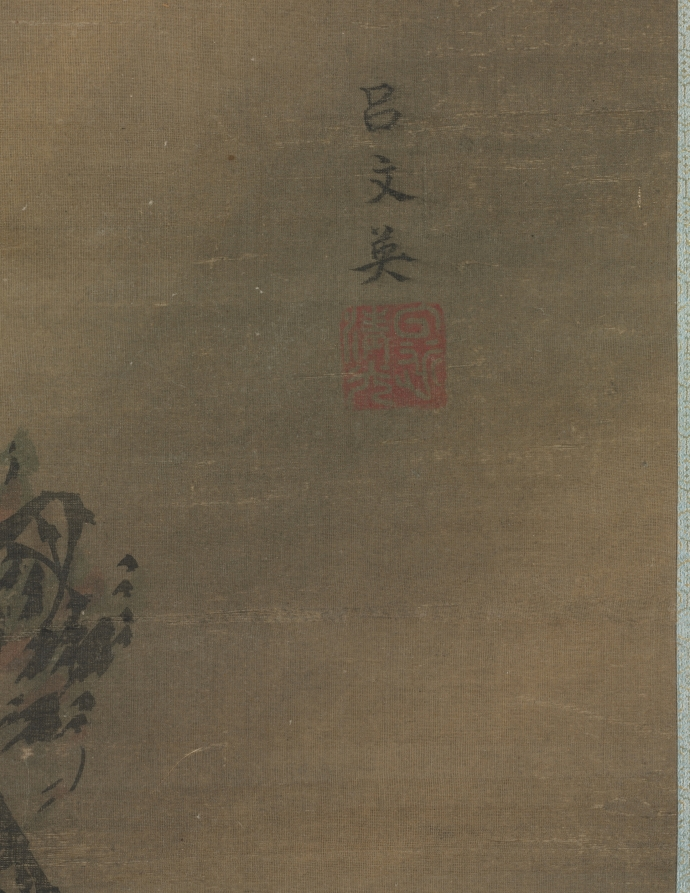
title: River Village in a Rainstorm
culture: China, Ming dynasty (1368–1644)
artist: Lu Wenying (Chinese)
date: c. 1480–1507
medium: Hanging scroll; ink and slight color on silk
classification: Painting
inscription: 呂文英 [印] 日近清光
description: In this scene, windswept rain pelting a village captures the power of nature in a masterful composition. Lü Wenying from Zhejiang served as a court painter during the Hongzhi era (1488–1505). Hardly known, with few remaining works, he is considered a Zhe school painter who followed the style of the Southern Song academy. Zhe school painters, named after the province of Zhejiang, transformed the poetic scenery of the Southern Song artists into dramatic, large-scale views. Active in the same region with frequent monsoon rains in the summer season, artists were familiar with outbreaks of rain and storms.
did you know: A young boy peeks out a window perhaps viewing the two people struggling through the rain.